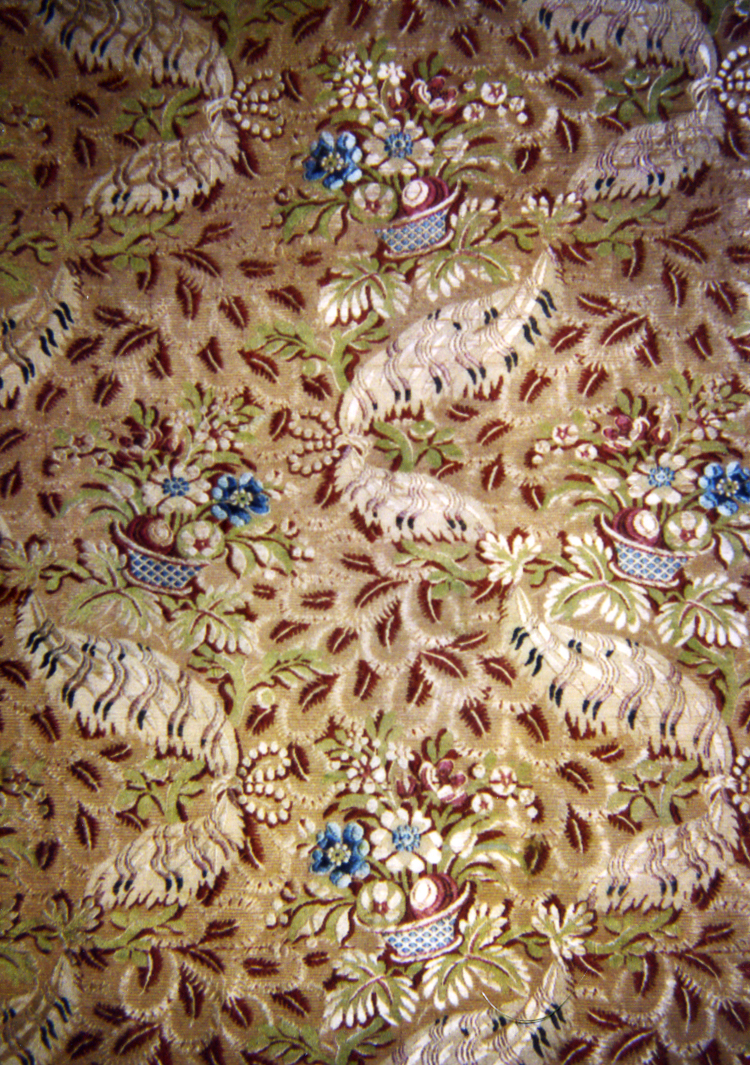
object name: Textile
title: Panel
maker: France, Lyon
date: Mid–18th century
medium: Silk, plain weave with patterning warps, brocading wefts, and self-patterned by complementary ground wefts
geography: Lyon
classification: textile; weaving